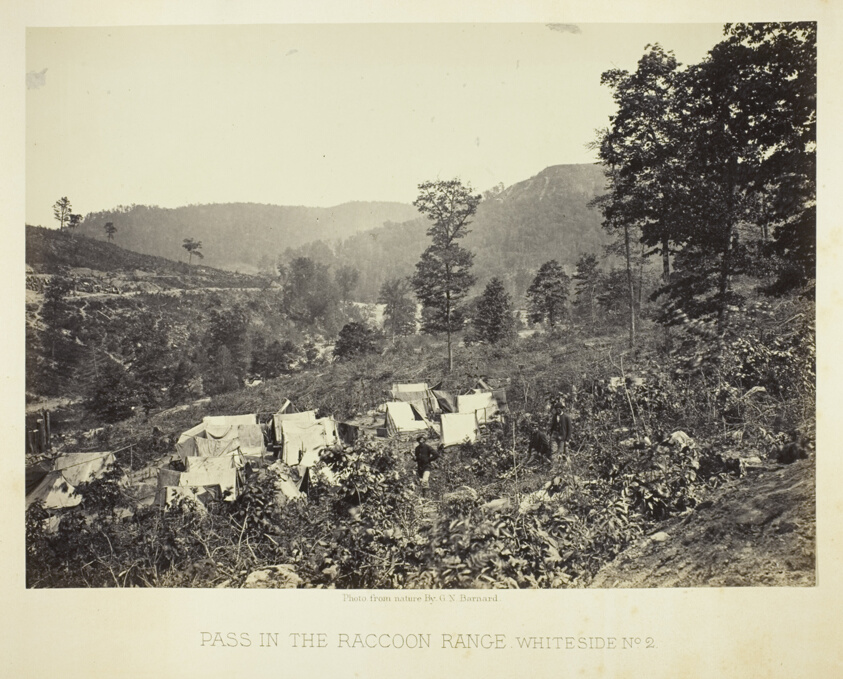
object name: Photograph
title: Pass in the Raccoon Range, Whiteside No. 2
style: 19th century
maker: George N. Barnard (American, 1819–1902)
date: 1864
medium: Albumen print, plate 7 from the album "Photographic Views of the Sherman Campaign" (1866)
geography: United States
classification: albumen silver print; photographic process; photography; photograph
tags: Collected by Hugh Edwards, Sherman's Campaign 1866